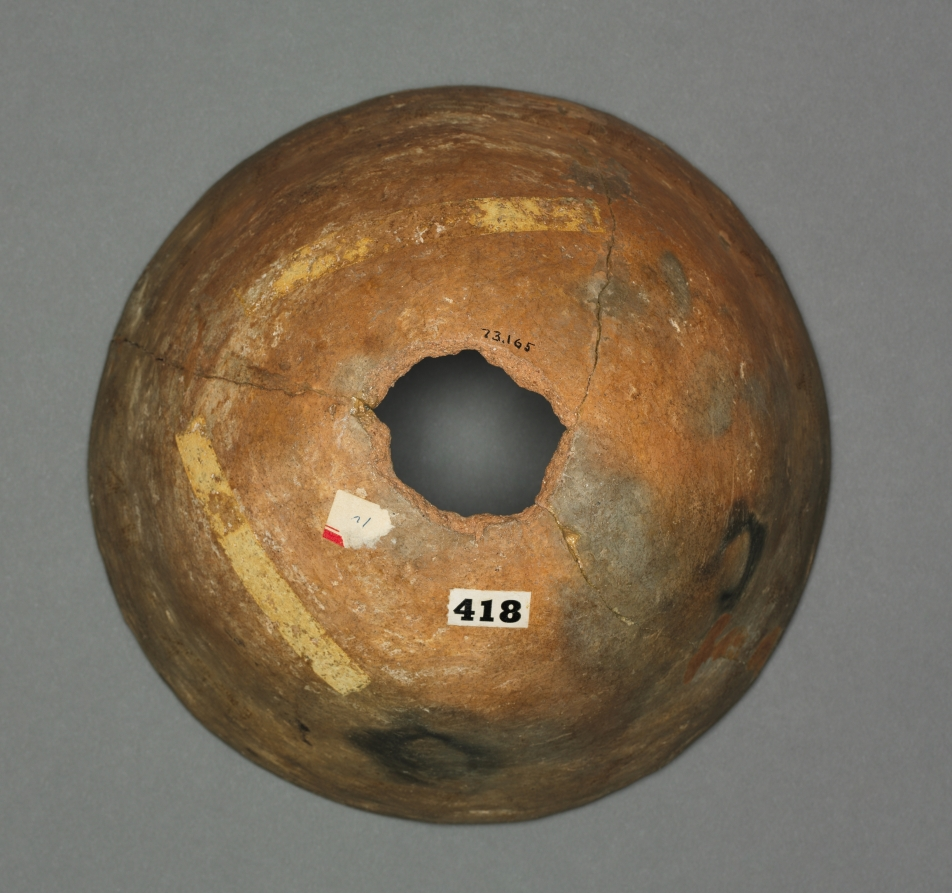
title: Bowl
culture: Southwest, New Mexico, Mimbres Valley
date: c. 1000–1200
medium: earthenware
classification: Ceramic